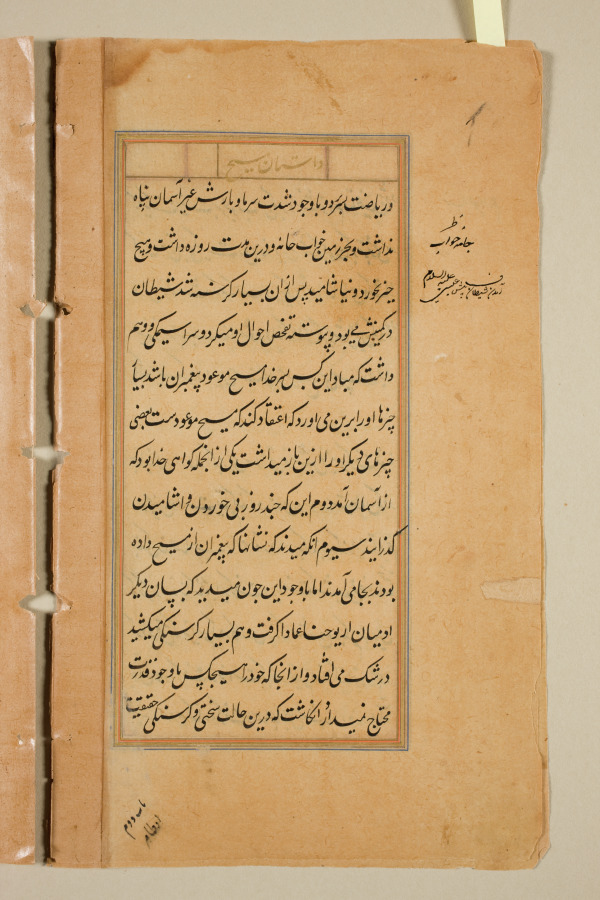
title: Text page from a Mirror of Holiness (Mir’at al-quds) of Father Jerome Xavier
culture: Mughal India, Allahabad, made for Prince Salim (1569–1627)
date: 1602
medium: Ink and gold on paper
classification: Manuscript